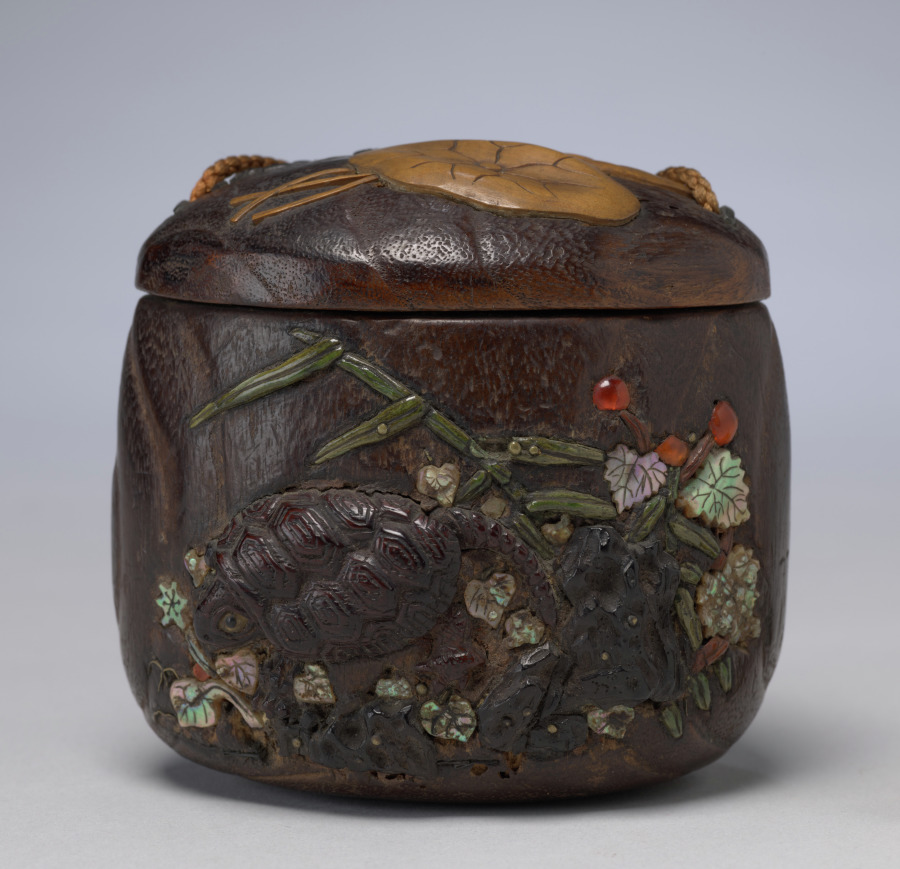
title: Tobacco Box with Turtles in Lotus and Grasses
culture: Japan, Edo period (1615–1868)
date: c. 1760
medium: Box: wood with color and metal, shell, and stone inlay; toggle (ojime): ceramic; netsuke: wood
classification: Miscellaneous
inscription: Box signed: 岷江 花押; sealed: 岷江; netsuke signed: 栗斎